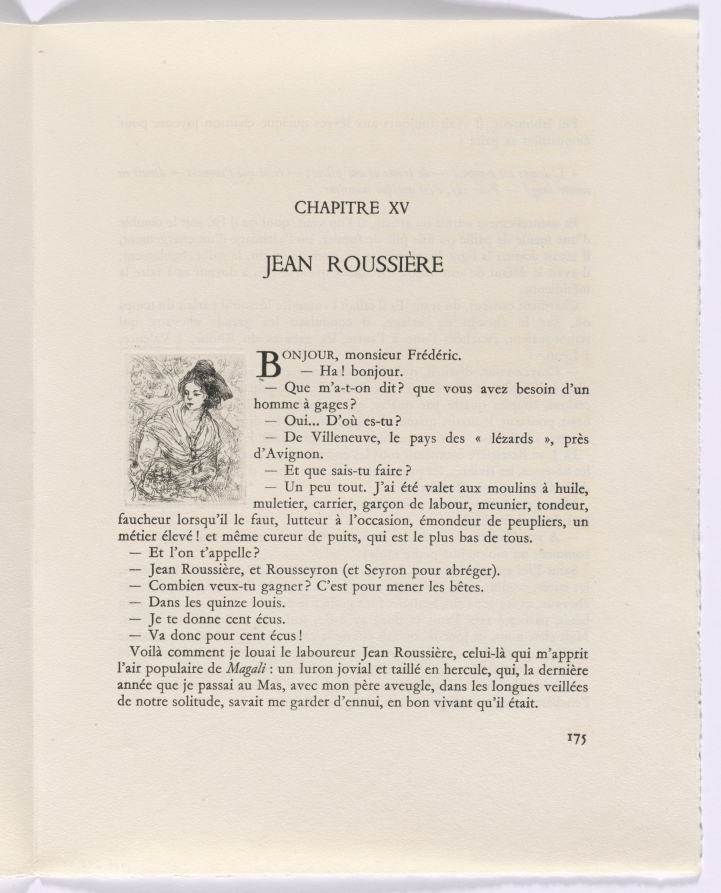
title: Frédéric Mistral: Mémoires et Recits by Frédéric Mistral: woman (page 175)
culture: France, 20th century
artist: Auguste Brouet (French, 1872–1941)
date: 1937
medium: etchings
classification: Portfolio